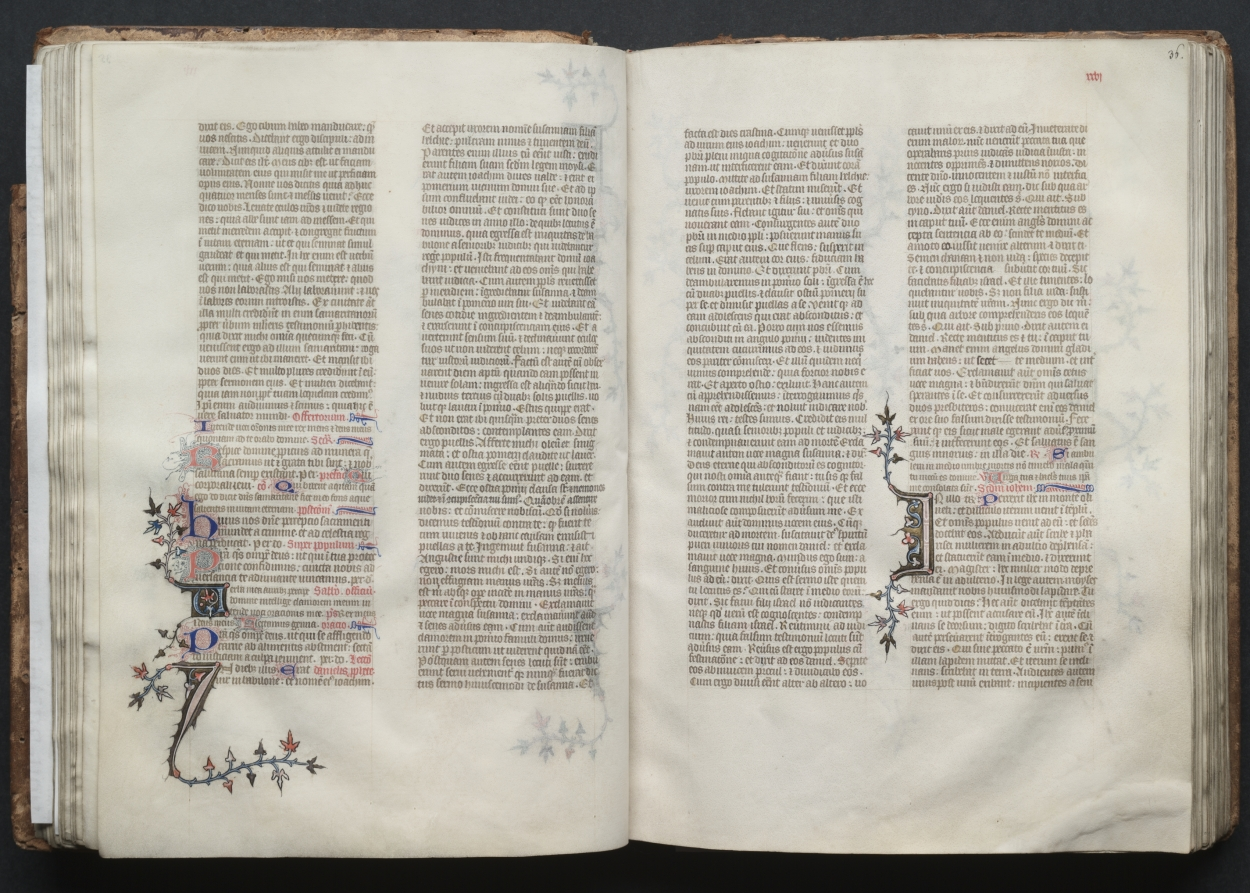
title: The Gotha Missal: Fol. 36r, Text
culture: France, Paris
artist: Master of the Boqueteaux (French)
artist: and Workshop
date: c. 1375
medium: ink, tempera, and gold on vellum; blind-tooled leather binding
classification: Bound Volume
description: The style and quality of this manuscript's decoration is typical of deluxe Parisian books made for aristocratic or royal patrons. Most of the book's decoration appears to be the work of the Master of the Boqueteaux, an artist active at the court of King Charles V (died 1380). His style was apparently shared by a number of book illuminators working in and around Paris. It is very possible that the Gotha Missal belonged to Charles V, but is not provable because the manuscript has no royal portraits and lacks a colophon. Given the book's magnificent decoration, however, it would seem that it was produced for a Valois prince, if not for the king himself. The manuscript receives its name from the German dukes of Gotha, its later owners.